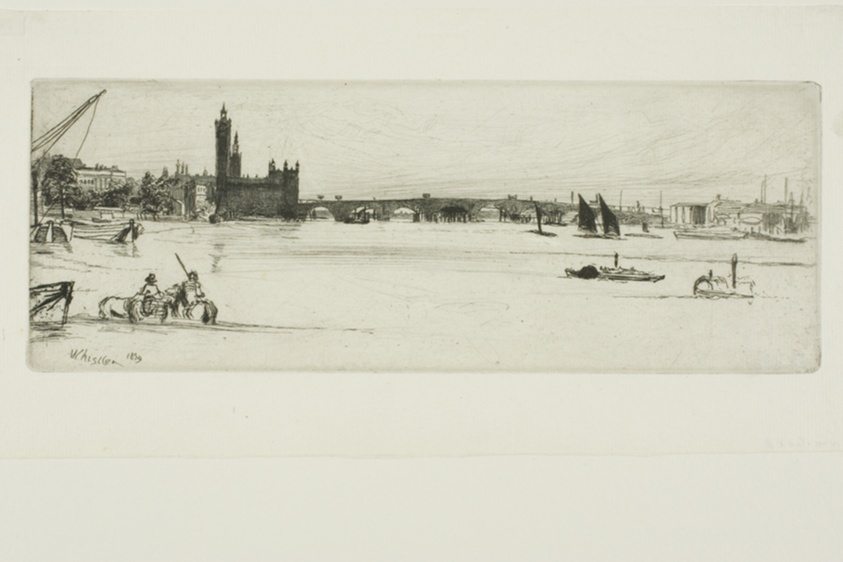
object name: Print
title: Old Westminster Bridge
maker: James McNeill Whistler (American, 1834-1903)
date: 1859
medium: Etching and drypoint in black ink on ivory laid paper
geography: United States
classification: etching; print; prints and drawing; paper; drypoint